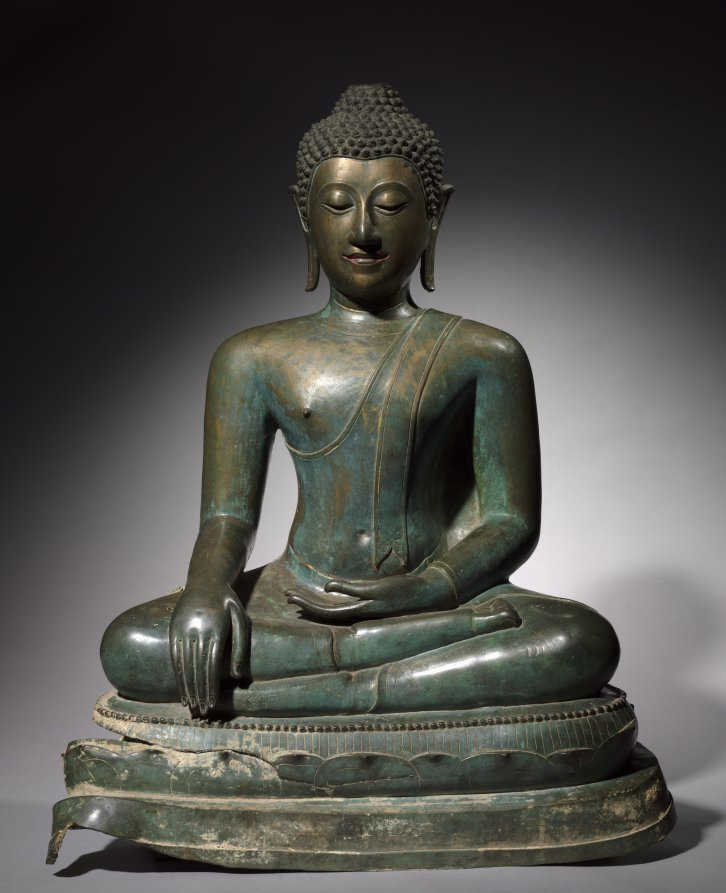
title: Seated Buddha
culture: Thailand, Chiang Mai, Chiengsen Period, 15th Century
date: c. 1400s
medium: bronze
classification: Sculpture